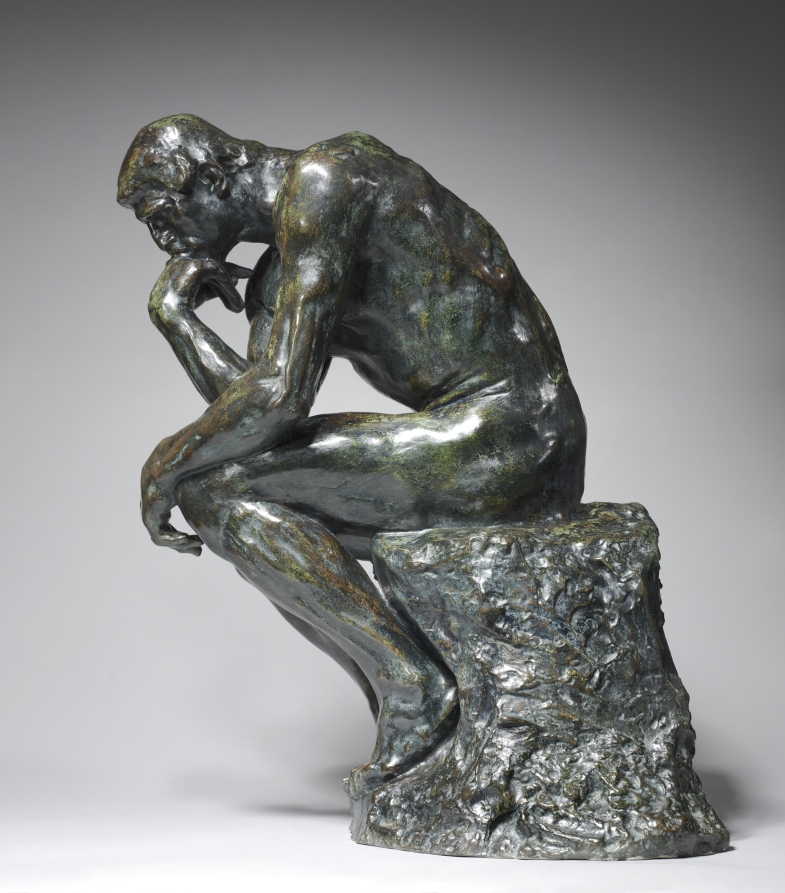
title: The Thinker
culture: France, 19th century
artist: Auguste Rodin (French, 1840–1917)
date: c. 1880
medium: bronze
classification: Sculpture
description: Rodin originally conceived The Thinker as a depiction of the Italian poet Dante Alighieri (1265–1321) sitting in the upper center of a monumental sculptural doorway titled The Gates of Hell (below). Inspired by Dante’s description of a journey through the underworld in his epic poem The Divine Comedy (about 1320), The Thinker contemplates mankind’s fate while gazing at a host of damned figures writhing in anguish below. Stripped of clothing, the figure’s rippling muscles convey an inner, animating life force symbolic of mental activity or creative effort. The figure leans forward, as if ready to spring from his perch, yet seems simultaneously caught in the inaction of deep thought. Rodin produced independent versions of The Thinker, first in this original size and later in a monumental version.